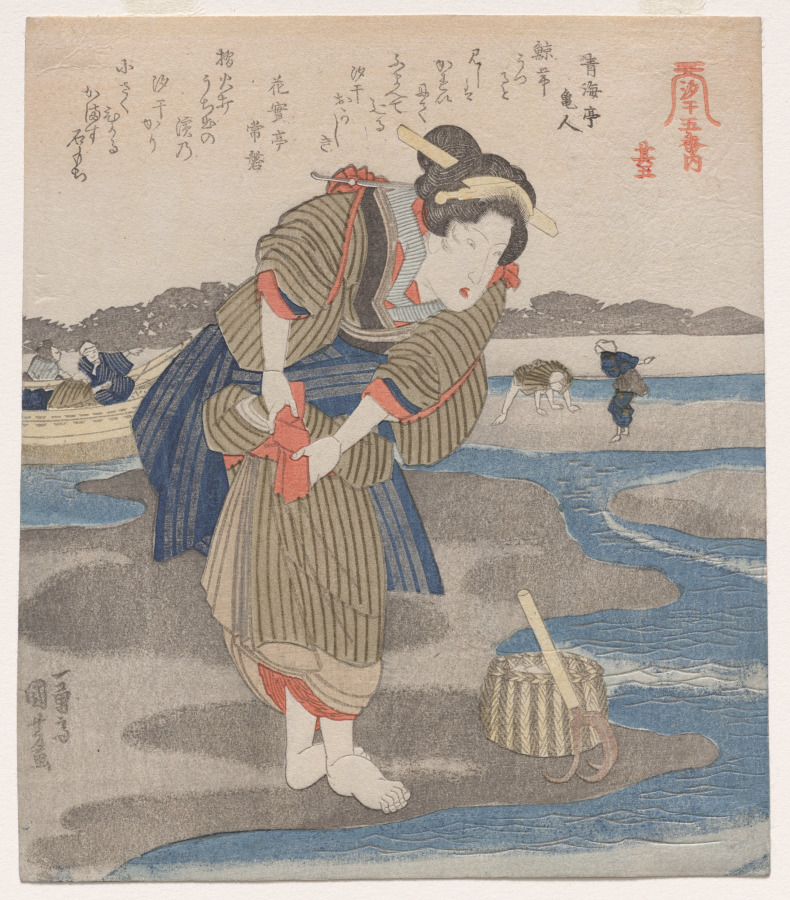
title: Fifth Print from A Low Tide Pentaptych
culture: Japan, Edo period (1615–1868)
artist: Utagawa Kuniyoshi (Japanese, 1797–1861)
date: c. 1830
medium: color woodblock print from a pentaptych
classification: Print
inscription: Signature: Ichiyusai Kuniyoshi ga.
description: This is one of five surimono, privately commissioned prints, making up an image of people collecting sea life at low tide. Ten witty poems, written by members of a poetry circle, appear across the upper part of the composition, with two poems on each print. Based in Edo (now Tokyo), the group was led by Hisakataya Misora (active 1810s–30s), who wrote four of the poems. This composition may have been printed in April, which was considered the best time for beachcombing.